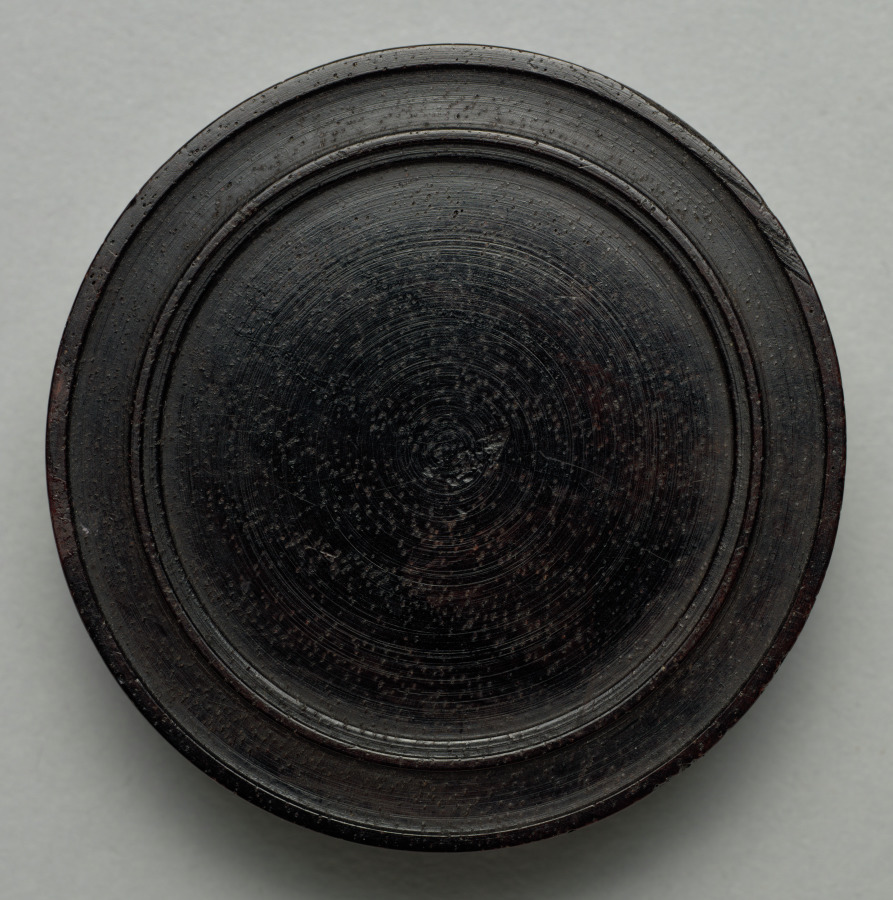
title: Gaming Piece (reverse)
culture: Germany, late 17th-early 18th Century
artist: Martin Brunner (German, 1659–1725)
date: c.1700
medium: wood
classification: Furniture and woodwork